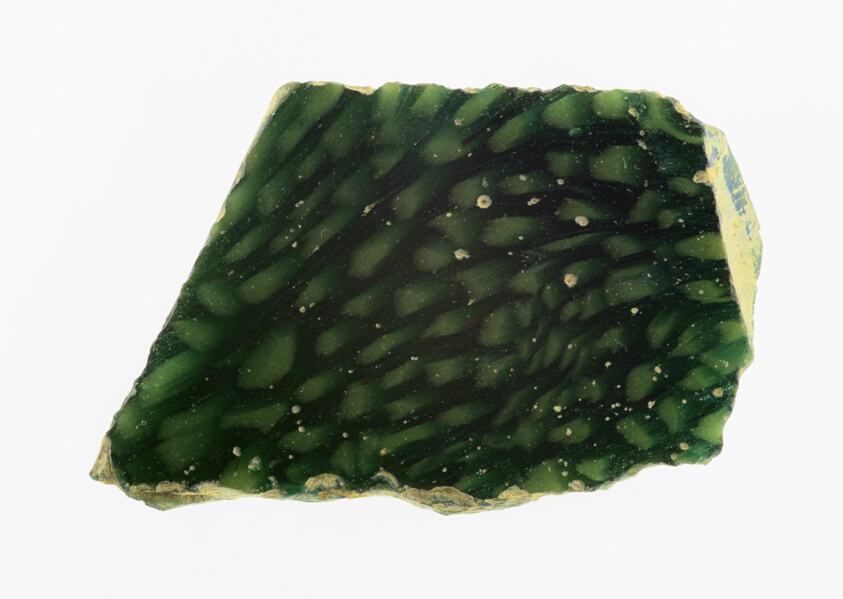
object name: Decorative Arts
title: Fragment of a Wall Revetment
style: roman (ancient, style or period), ancient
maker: Roman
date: 1st century BCE–1st century CE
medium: Glass, mosaic glass technique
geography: Roman Empire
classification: fragment; decorative arts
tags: decoration